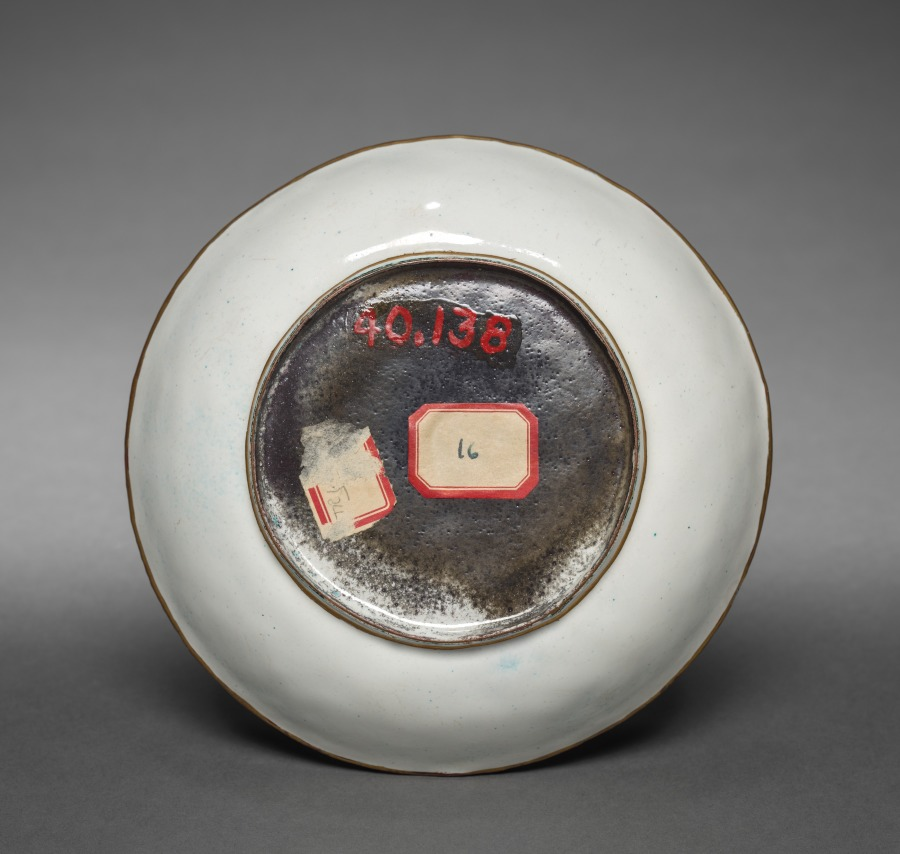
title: Cup and Saucer: Saucer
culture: England, mid-18th Century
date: mid-18th century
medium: enamel on metal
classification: Enamel